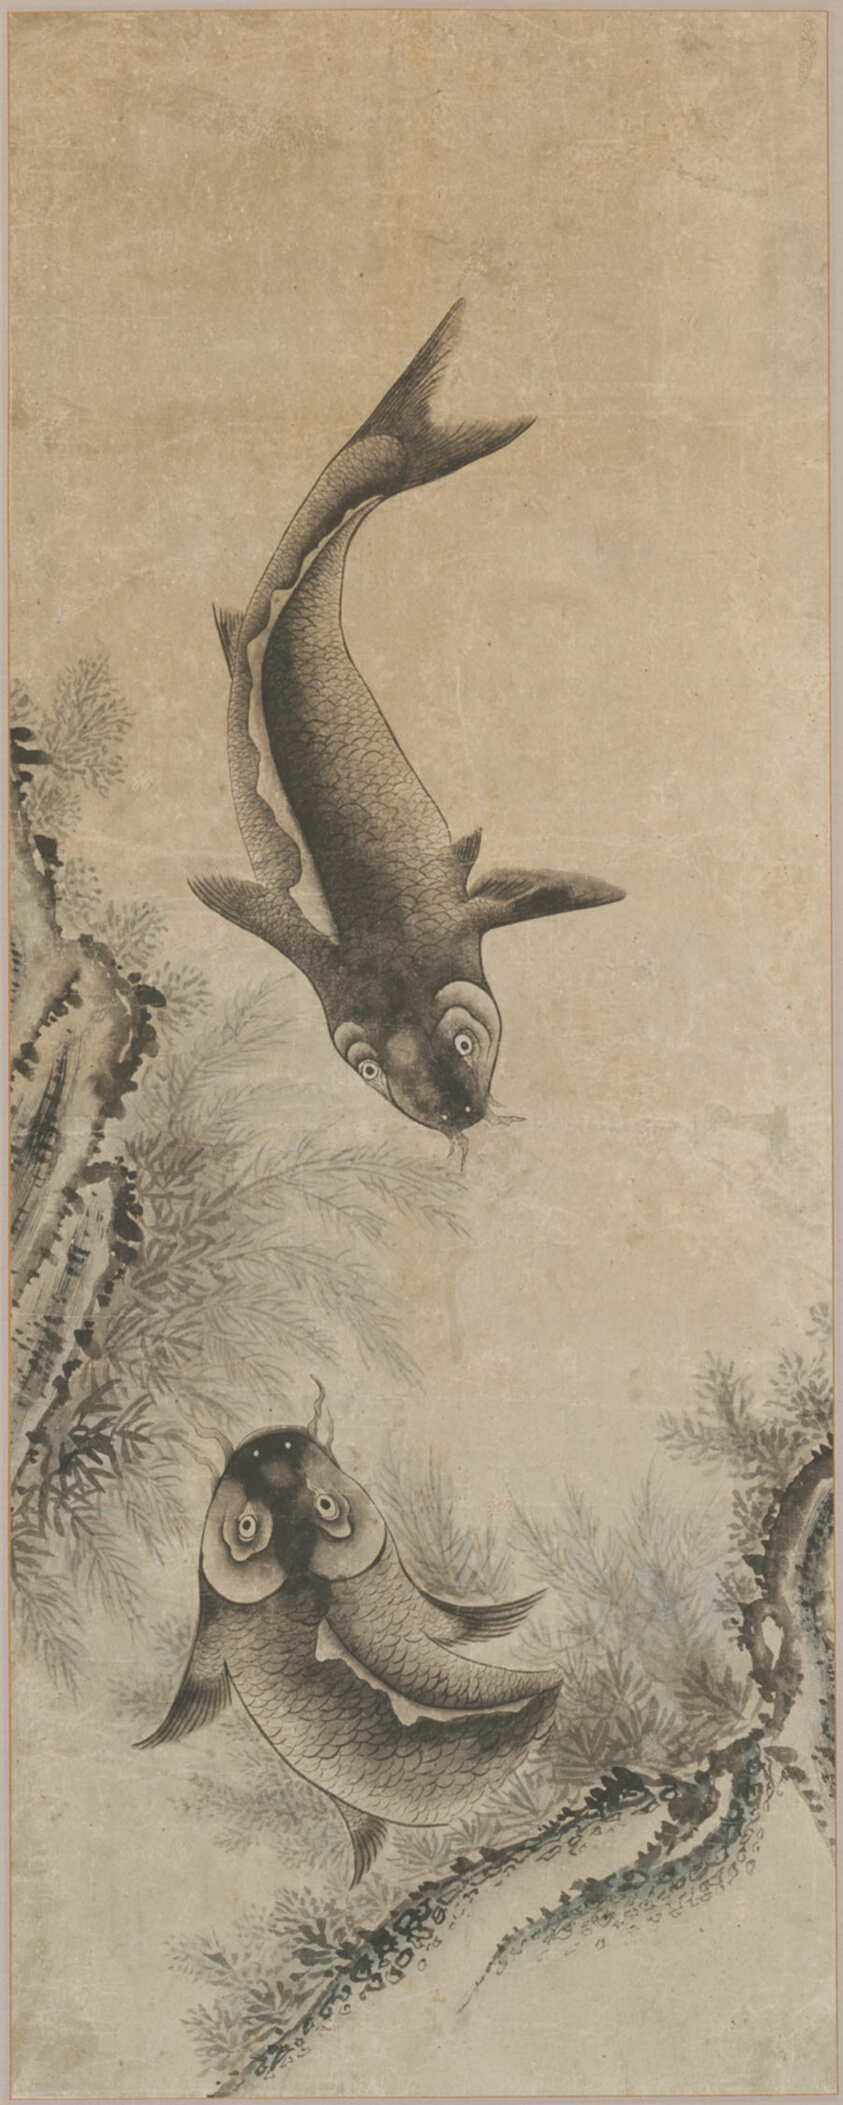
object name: Painting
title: A Pair of Carp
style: Korean (culture or style)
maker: Korea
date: Joseon dynasty (1392–1910)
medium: Ink and colors on paper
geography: Korea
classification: ink; painting